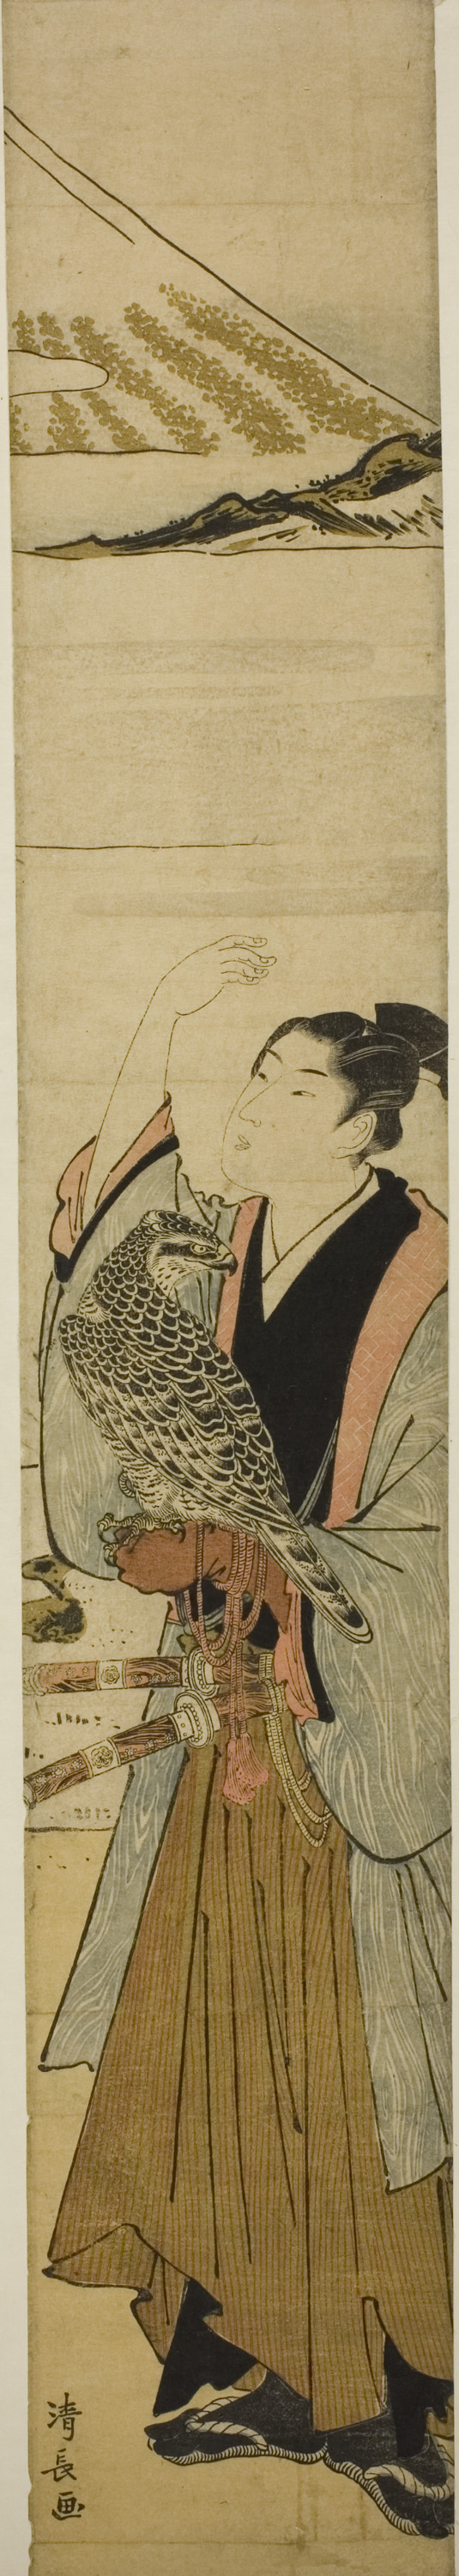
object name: Print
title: Young Man with Symbols of the First Dream of the New Year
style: Japanese (culture or style)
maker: Torii Kiyonaga (Japanese, 1752-1815)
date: c. 1782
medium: Color woodblock print; hashira-e, right sheet of diptych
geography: Japan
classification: woodblock print; print; asian art